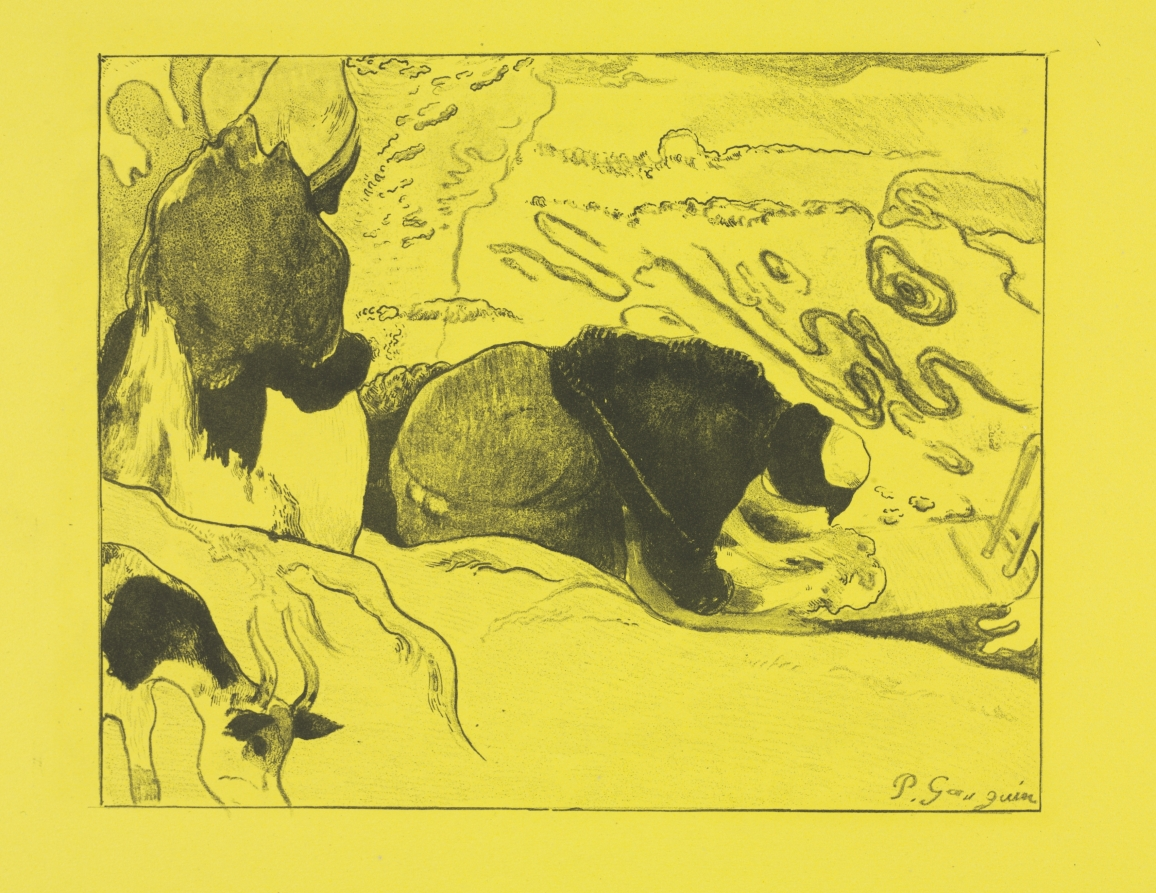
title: Volpini Suite: Laundresses (Les Laveuses)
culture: France, 19th century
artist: Paul Gauguin (French, 1848–1903)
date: 1889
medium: zincograph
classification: Print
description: Gauguin discovered an exotic, primitive culture in Brittany, a rugged region on the Atlantic coast in northwestern France. He then sought to translate into expressive forms the picturesque costumes, customs, and special spirituality of the peasants. The unusual point of view, the stylization of the frothing water, and the cropped cow at the lower left all betray the influence of Japanese woodblock prints, which became popular in France from the early 1860s. The twelve lithographs in this set, printed from zinc plates rather than stones, were Gauguin's first attempts at printmaking. To heighten the decorative effect, the lithographs were printed onto large sheets of bright yellow paper.